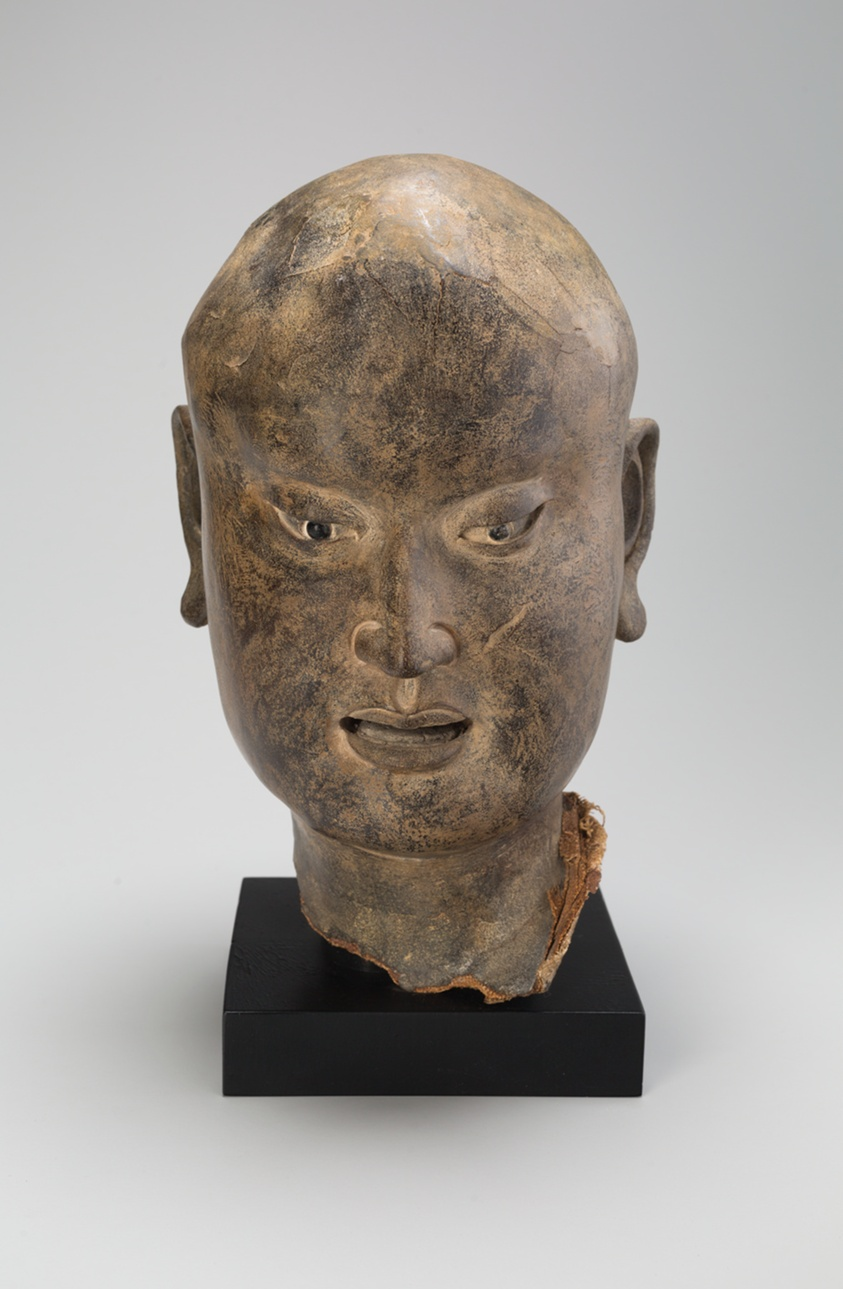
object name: Sculpture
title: Head of a Luohan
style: Chinese (culture or style), northern song, liao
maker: China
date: Northern Song, Liao, or Jin dynasty, c. 11th century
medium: Hollow dry lacquer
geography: China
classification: lacquer; sculpture; asian art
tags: heads, religion, religious figures, Buddhism, Chinese, portraits